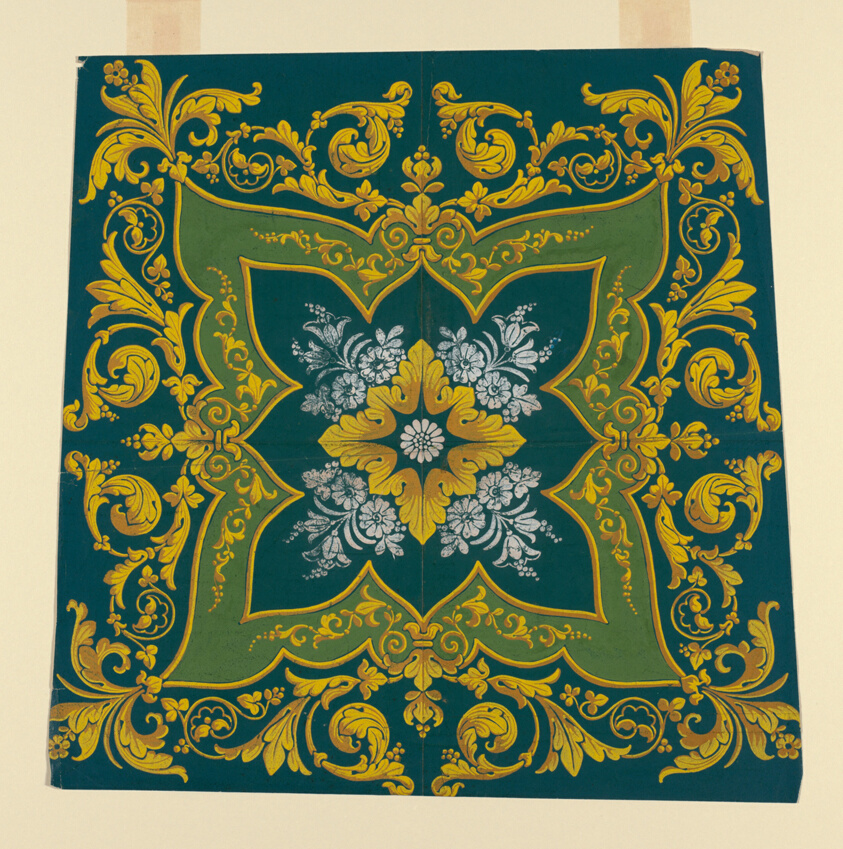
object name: Textile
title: Design for a Cushion or Chair Seat Cover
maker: France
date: 1804/14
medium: Design on paper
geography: France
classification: textile; accessory - paper design; accessories (object genre)